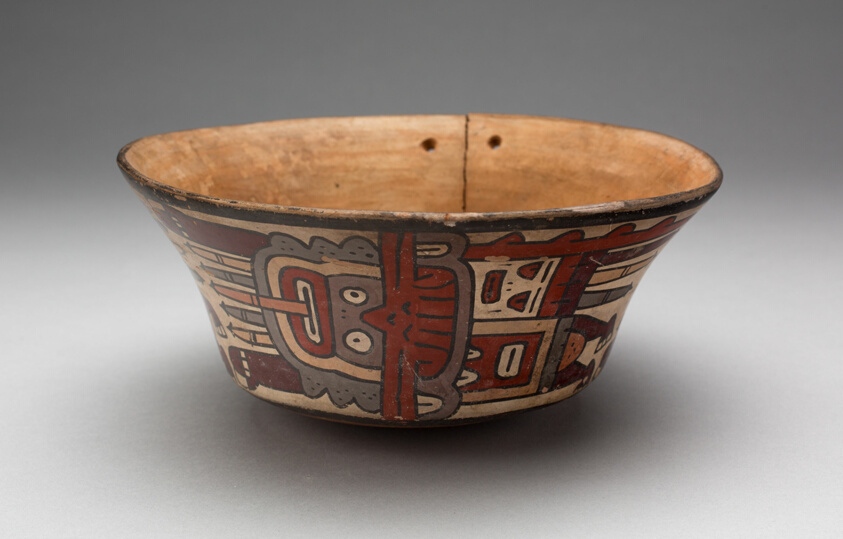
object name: Vessel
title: Small Flaring Bowl Depicting Costumed Ritual Performers [Cracked]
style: nazca, early intermediate period, Pre-Columbian, americas, Arts of the Americas, andean, andes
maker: Nazca; South coast, Peru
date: 180 BCE–500 CE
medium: Ceramic and pigment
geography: Nazca Valley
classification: bowl; earthenware; ceramics; vessel; art of the americas